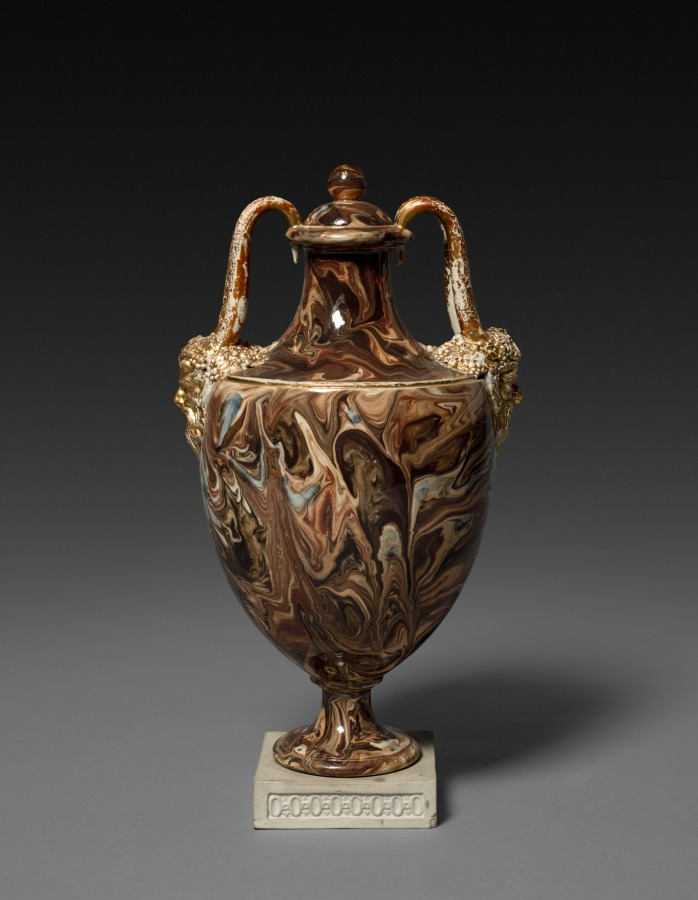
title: Agateware Vase with Cover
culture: England, Staffordshire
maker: Wedgwood and Bentley (British, Staffordshire, 1769–1780)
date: c. 1770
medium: Marbled earthenware (agateware) with gilt decoration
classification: Ceramic